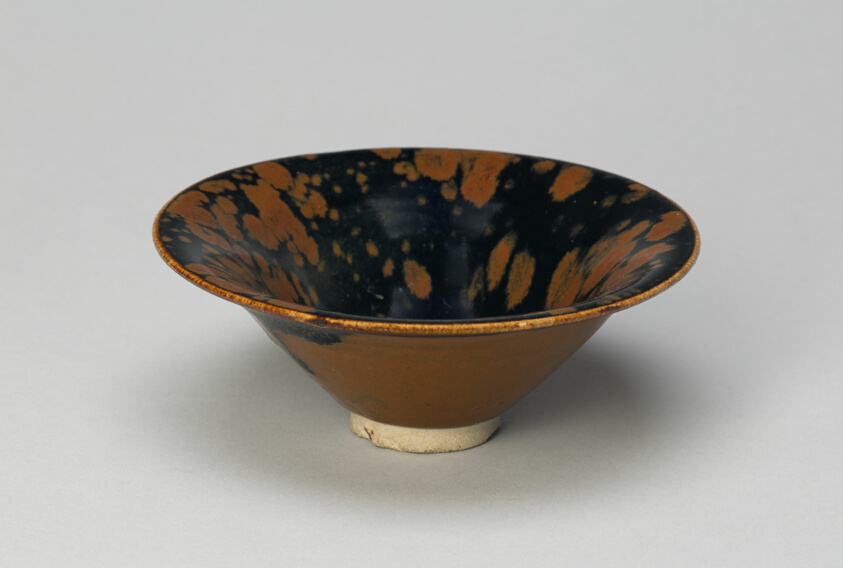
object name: Vessel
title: Bowl with Flared Rim and “Partridge-feather” Mottles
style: Chinese (culture or style)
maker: China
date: Northern Song (960–1127) or Jin dynasty (1115–1234), late 11th/12th century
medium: Northern black ware, Cizhou type; stoneware with overglaze and russet markings (interior) and russet “skin”(exterior)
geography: China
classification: bowl; dish (vessel); vessel